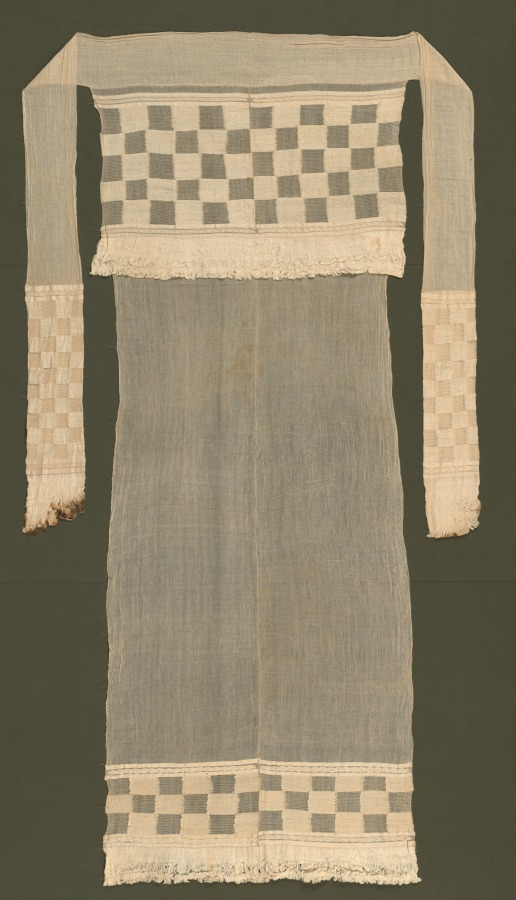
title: Loincloth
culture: Peru, North Coast, Chimú style, 1200–1460s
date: 1425–1500 (radiocarbon date, 92.3% probability)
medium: cotton; plain weave, brocaded and complex alternating gauze with 5 shots of plain weave between gauze shots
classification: Garment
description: Loincloths were basic men’s wear in ancient Peru. But the extraordinary size of some examples—this one is about eight feet long, unfolded—makes it difficult to know how they were worn, except that they were tied around the waist with the decorated panels hanging at the front and back of the body. The appearance may have been that of a billowing skirt.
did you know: This loincloth is huge!